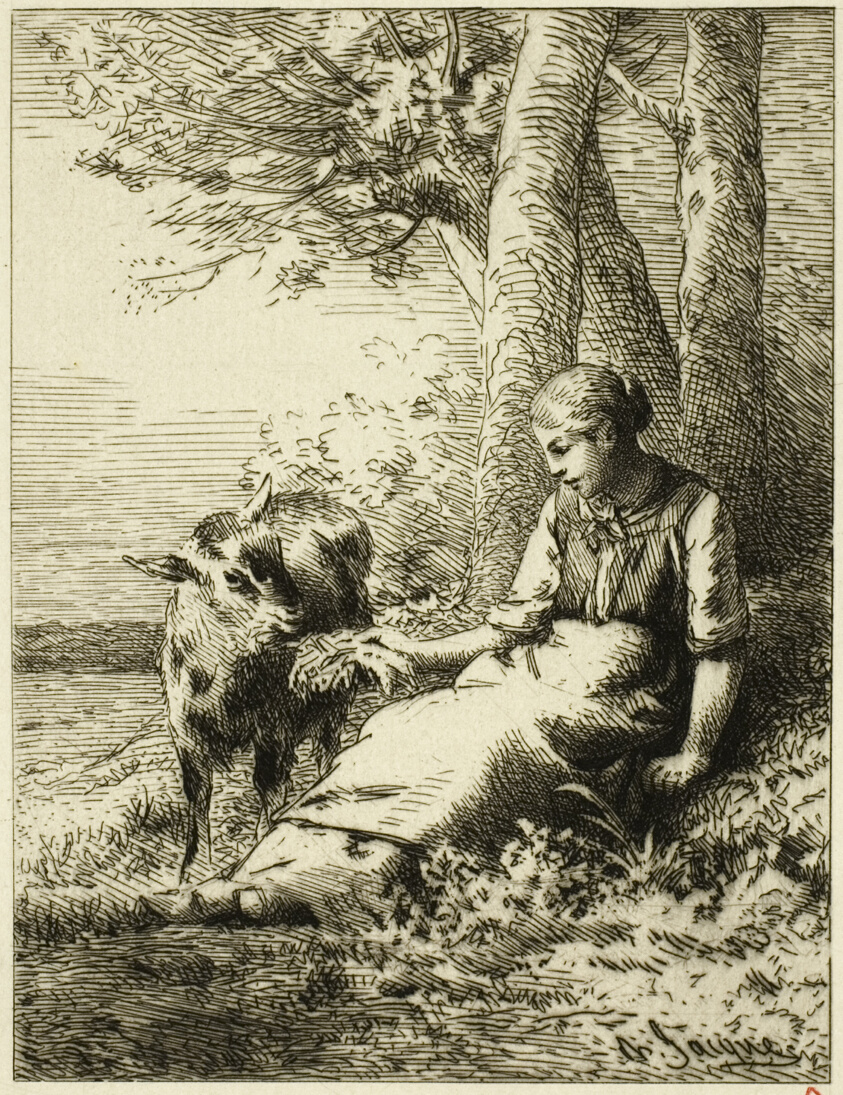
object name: Print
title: Shepherd with Flock of Sheep at Edge of Wood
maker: Charles Émile Jacque (French, 1813-1894)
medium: Etching on paper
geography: France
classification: print; prints and drawing